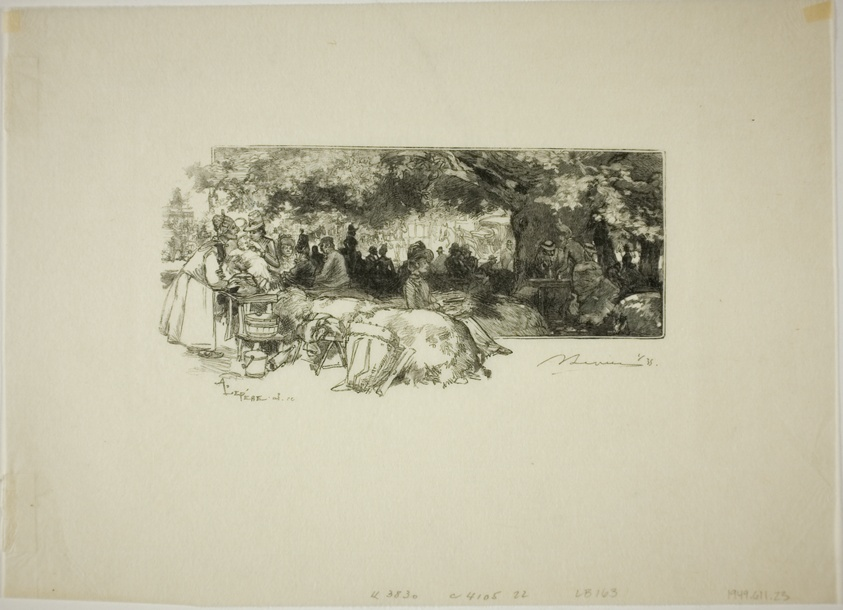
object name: Print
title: Mother Pichard's Canteen, Near Gorge aux Loups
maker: Louis Auguste Lepère (French, 1849-1918); published by A. Desmoulins (French, active c. 1908-1910)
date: 1888, published 1908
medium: Wood engraving in black on cream laid Japanese paper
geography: France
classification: wood engraving; print; prints and drawing